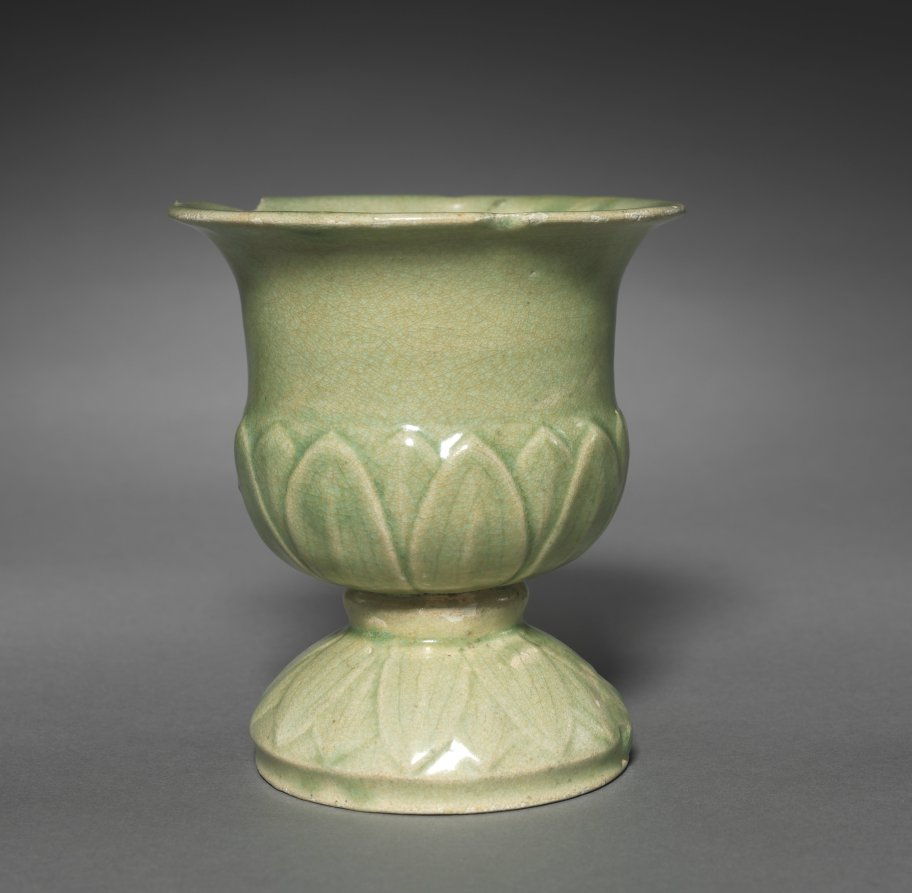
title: Incense Burner with Lotus Petal Design in Relief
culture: Korea, Goryeo dynasty (918–1392)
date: 1100s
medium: stoneware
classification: Ceramic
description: Celadons wares used for everyday such as this incense burner were among the most common burial objects in tombs during the Goryeo period (918–1392). Furnishing tombs with an elaborate assemblage of objects was believed to honor and comfort the newly dead. Generally, Goryeo tombs were left untouched until the late 19th century. During the colonial period (1910–45), however, Japanese archaeologists competitively excavated the tombs located in Kaeseong, the former capital of the Goryeo period, and these wares soon became available for Japanese and Western collectors.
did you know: This incense burner may have been produced at one of the state-run kilns located in Kangjin, southern Jeolla province. The exterior decor that resembles an opening lotus flower was shaped in a carved wooden mold. Then the potter touched it up with incised details.